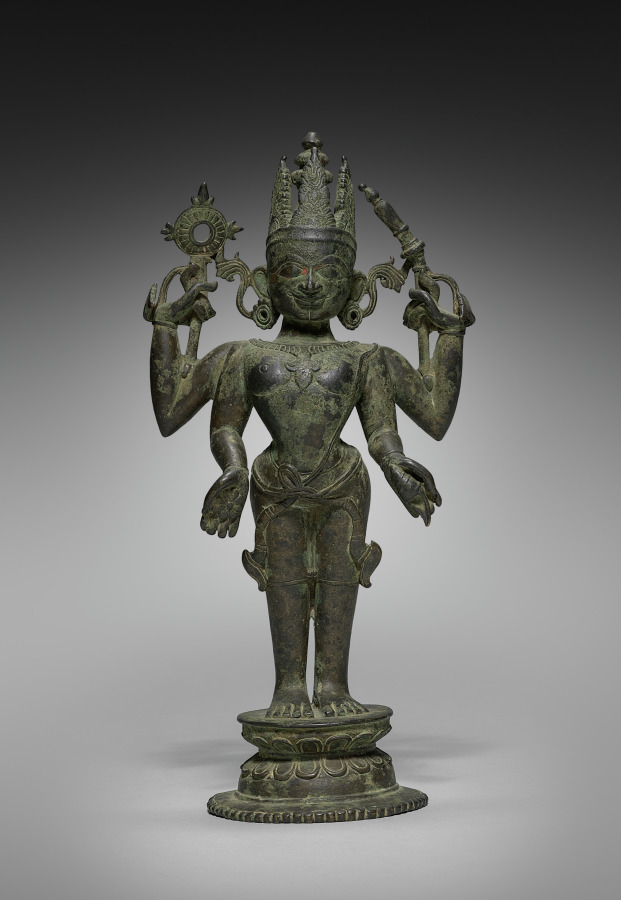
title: Vasudeva - Vishnu - Narayana as Shridhara, one of the 24 forms of Vishnu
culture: West India, 16th-17th century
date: 1500s–1600s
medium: brass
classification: Sculpture